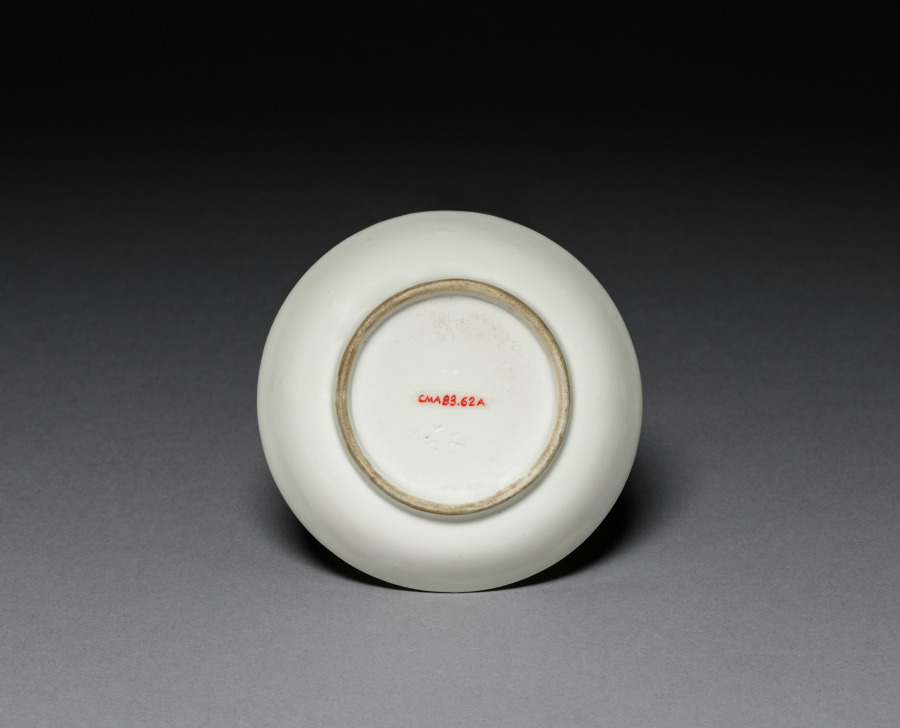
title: Saucer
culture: France, 18th century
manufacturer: Saint Cloud Porcelain Factory (French)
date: 1775–1799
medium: soft-paste porcelain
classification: Ceramic